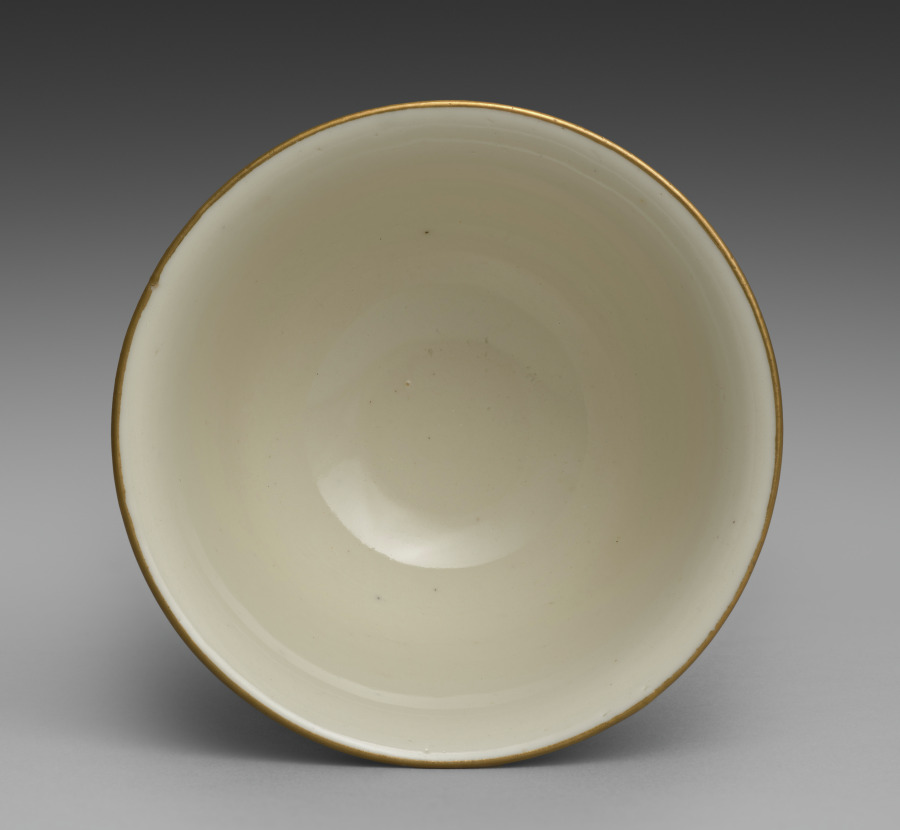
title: Drinking Cup from Dining Set with Plum Blossoms and Cracked-Ice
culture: Japan, Meiji period (1868–1912)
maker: Seifū Yohei II (Japanese, 1844–1878)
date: c. 1875–78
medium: Porcelain with molded designs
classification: Ceramic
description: Each item in this set has a delicate low-relief design of flowering plum branches over scattered, intersecting lines meant to resemble the cracked-ice surface of a frozen body of water and is signed on the base in gold pigment. While Yohei II produced many fine works in underglaze blue, like those produced by Kiyomizu Shichibei, he also made works in quite different styles later in his career, from the early 1870 s. In 1873, he was appointed purveyor to the Industrial Center of Kyoto Prefecture, a designation associated with Kyoto’s efforts to reach an international market through the port of Kobe; and from 1875 until his death, he was involved in national-level projects to present Japanese ceramics across the world. It was during this period that Yohei III was apprenticed to Yohei II, and it has been suggested that this set may in fact be an early example of Yohei III’s work, which he signed with his teacher’s name. Decorated with flowers resembling Japanese textile motifs, the set calls to mind the design of Yohei II’s pair of vases with plum blossoms in the Victoria and Albert Museum. Here, the elaborate trees created for a formal public exhibition setting have been translated into the approachable blossoms of the genteel domestic environment. While the designs are consistent across the pieces, each raised flower petal and pistil and each incised line in the ice was done by hand, so the cups, bowls, and dishes are similar yet unique. The bottoms of two boxes once identified the set’s owner, but the information has been deliberately obscured with black ink. However, inscriptions still visible appear to indicate two occasions, once at the end of July 1886 , and once again in June 1916 , when parts of the set were requested from Hokura in Niigata Prefecture. The location corresponds to a neighborhood in the present-day city of Jōetsu. The surname Tsuji 辻 also appears on a paper tag affixed to one of the box cloths. Future research may possibly reveal more about their provenance. A vase by Yohei III in a private collection combines the formal grandeur of the Yohei II vases in the Victoria and Albert Museum with the gentler design of this dining set, placing flowering plum trees against soft, scalloped-edge clouds resembling those in golden screens.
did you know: The dining wares have a creamy white coloration that the four boxes containing them identify as Korean in style.